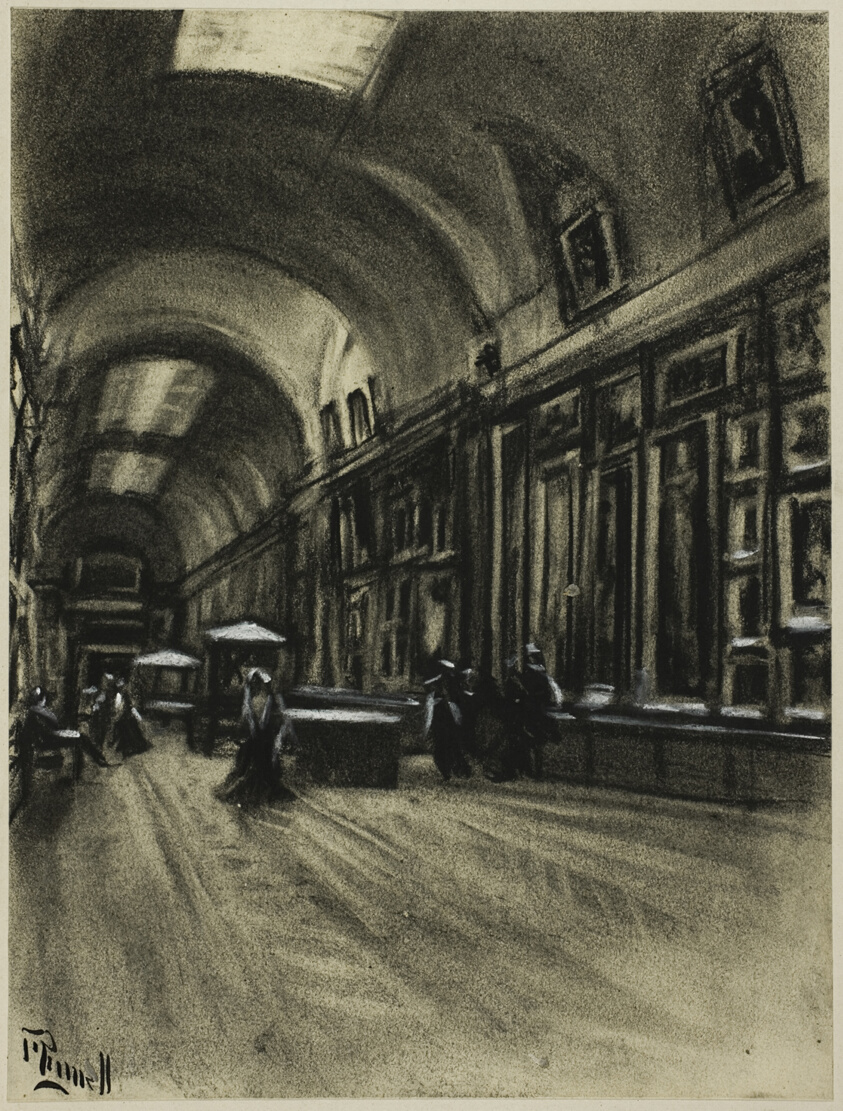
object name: Drawing and Watercolor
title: The Long Gallery, Prado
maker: Joseph Pennell (American, 1857-1926)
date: c. 1903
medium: Oiled charcoal with stumping and erasing, heightened with white chalk, on cream wove paper, perimeter mounted on off-white wood pulp laminate board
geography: United States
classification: charcoal; drawings (visual works); prints and drawing